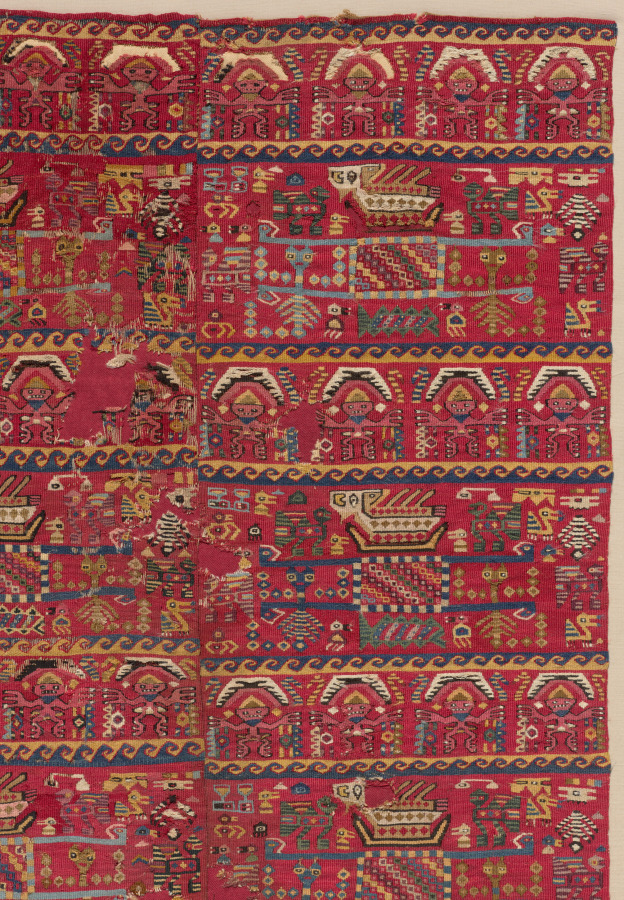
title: Two Tapestry-woven Panel Fragments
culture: Central Andes, North Coast, Chimú people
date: 1000–1460s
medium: camelid fiber and cotton, tapestry weave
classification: Tapestry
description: These two fragments, mounted side-by-side, come from the Chimú (chee-moo) Empire of Peru’s north coast. Each features horizontal rows containing four frontal figures. The rows alternate with wider registers, each with an H shape that represents a litter seen from above. A form of transport reserved for only the most esteemed members of society, the litter would have been carried by human porters via poles at each corner. Scattered around each are small creatures, including birds, a fish (located beneath), and two insect-like creatures posed as if they were carrying the litter. The objects hovering above the litter have not been identified.